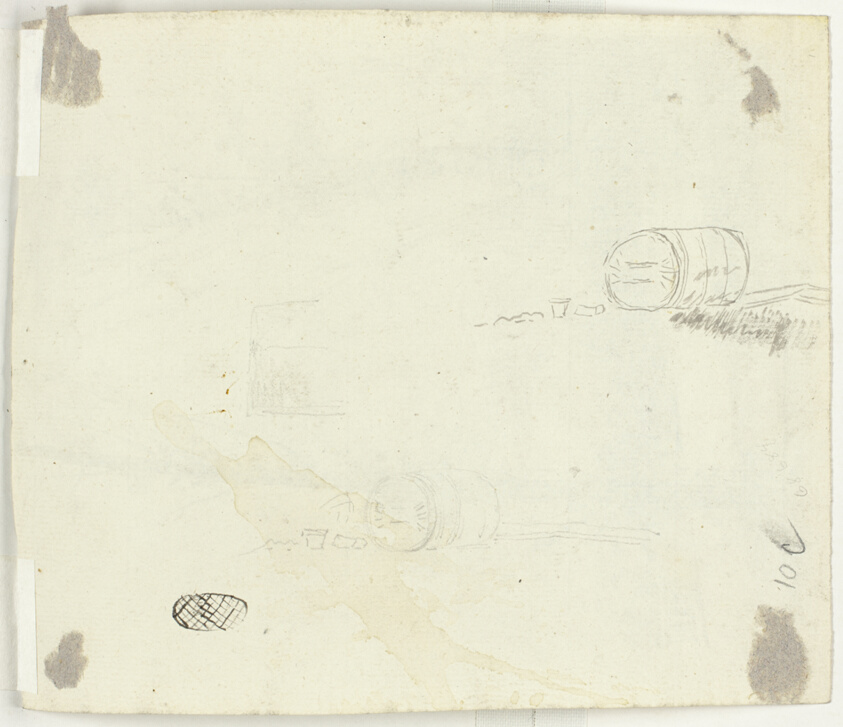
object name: Drawing and Watercolor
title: Sketches of a Barrel and Other Objects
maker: Pierre Antoine Mongin (French, 1761-1827)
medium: Brush and gray and black ink, with graphite, on ivory laid paper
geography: France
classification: drawings (visual works); prints and drawing